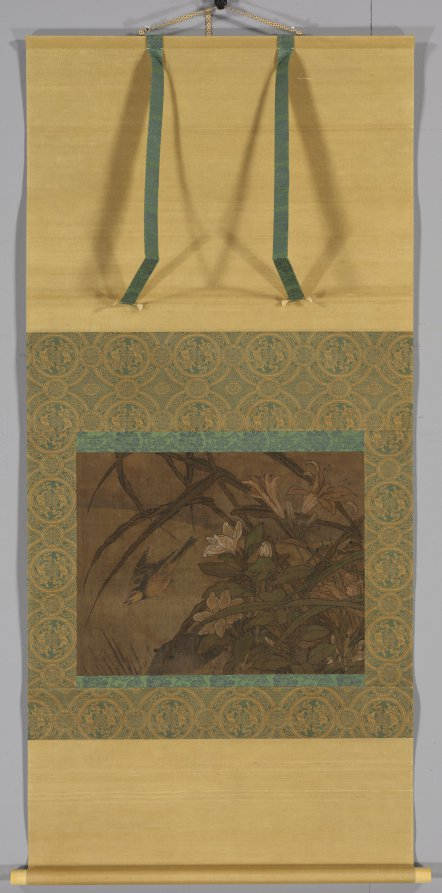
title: Birds and Flowers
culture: Japan, Muromachi period (1392–1573)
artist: attributed to Sesshū Tōyō (Japanese, 1420–1506)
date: mid-1400s-early 1500s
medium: Hanging scroll from a triptych; ink and color on silk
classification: Painting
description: This is one of two paintings possibly by Sesshū Tōyō. They once flanked a central scroll with an ink landscape. The unbalanced nature of the compositions, however, suggests they may be images recycled from larger paintings. The one with sweet osmanthus and hibiscus is an autumn scene, the other is a summer scene with daylilies and gardenias. Folding screens often contrast two seasons or depict all four across a single pair of screens. Sesshū’s works were sufficiently prized that repurposing them in fragmentary form to display in an alcove of a luxurious room would not be an unusual choice.